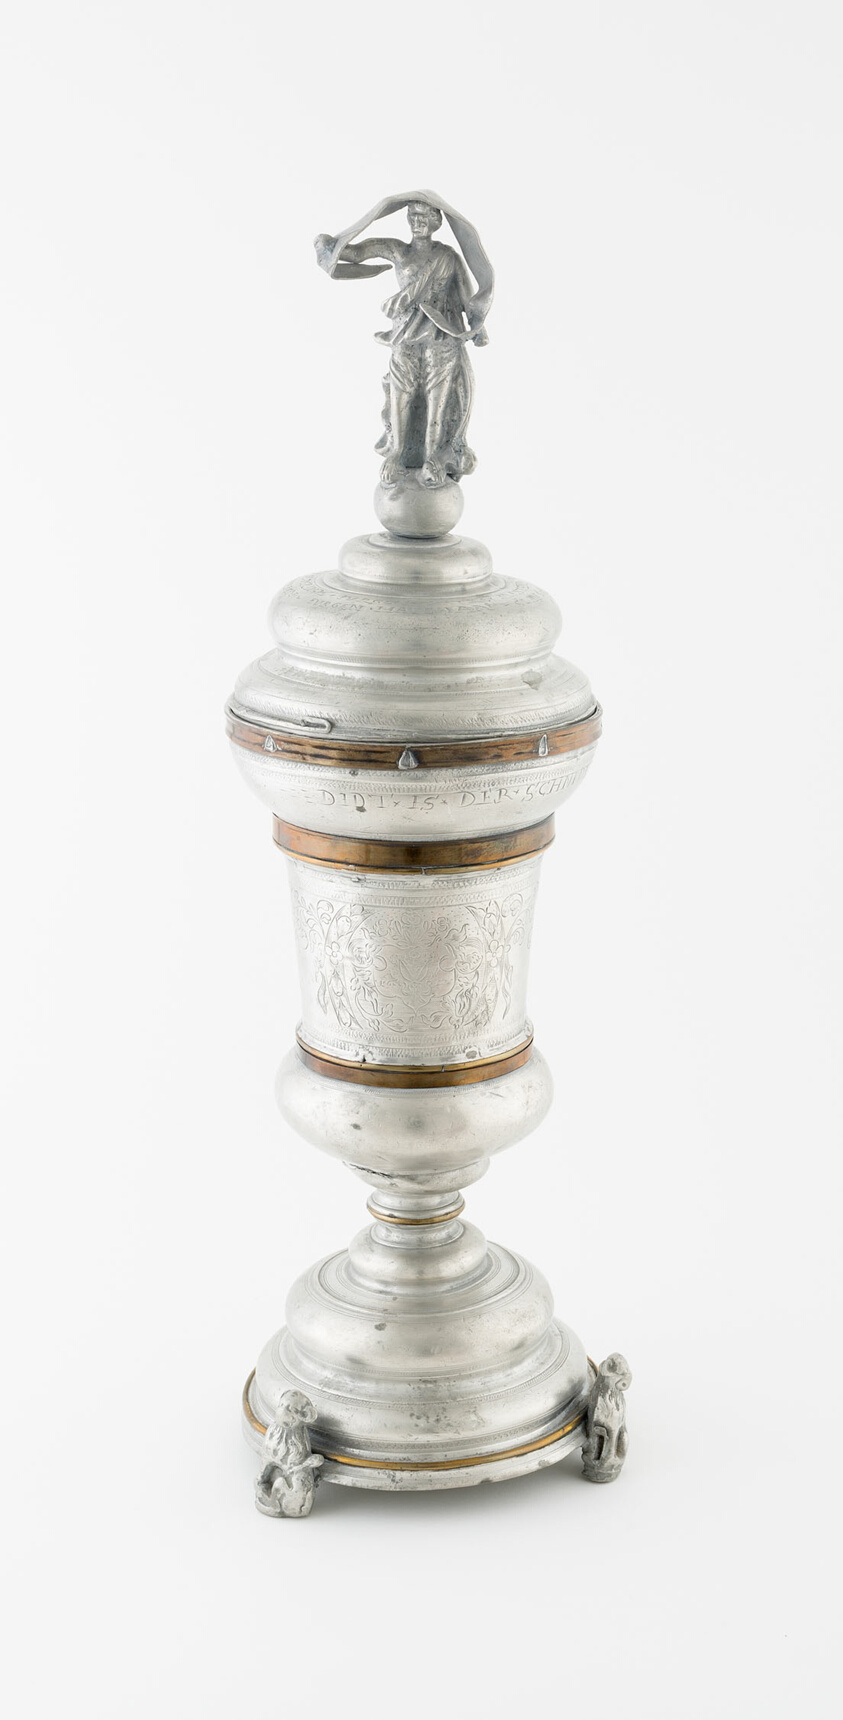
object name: Metalwork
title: Tailors' Guild Cup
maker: Northern Germany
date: 1632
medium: Pewter and brass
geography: Northern Germany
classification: drinking vessel; pewter; metalwork; european decorative arts